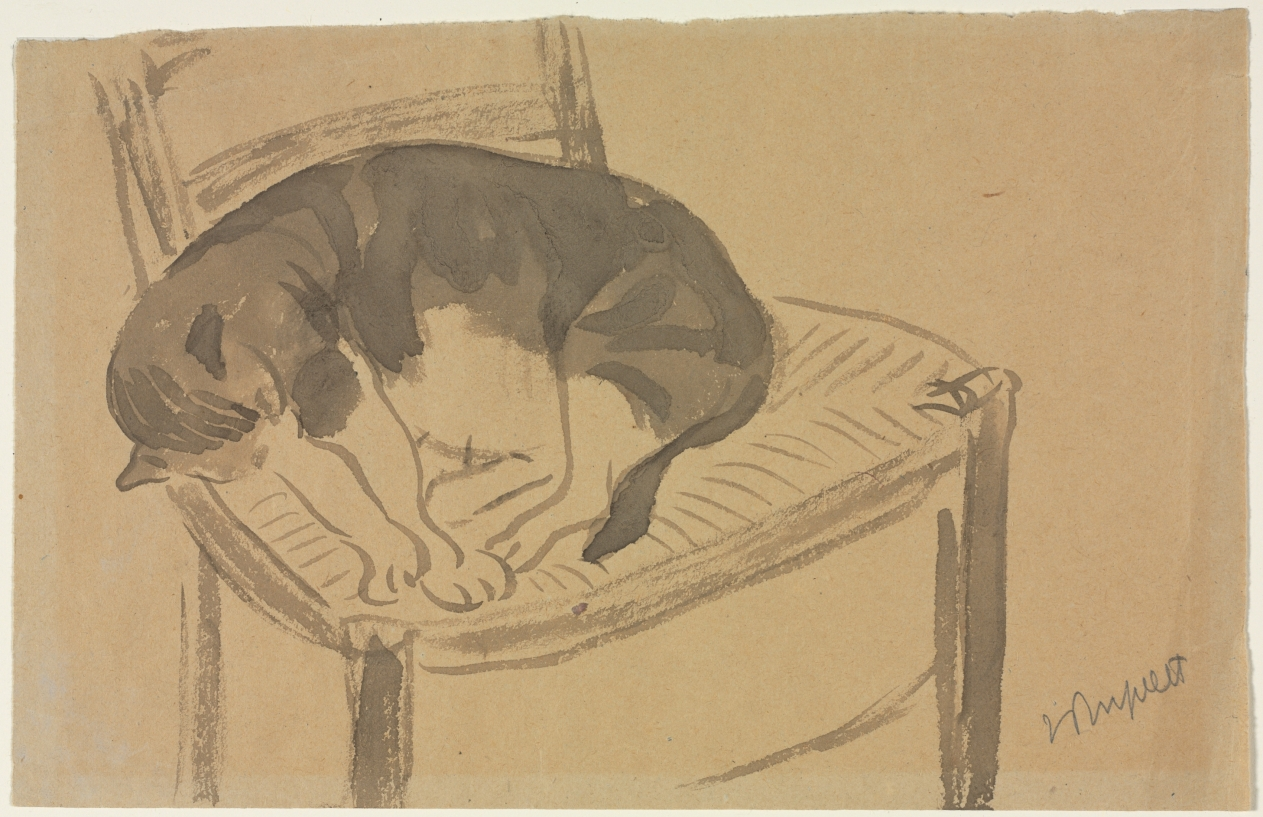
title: Sleeping Cat (recto)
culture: France, 20th century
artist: Jane Poupelet (French, 1878–1932)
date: 1900–1932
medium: brush and gray wash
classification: Drawing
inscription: signed, lower right, in graphite: j Poupelet